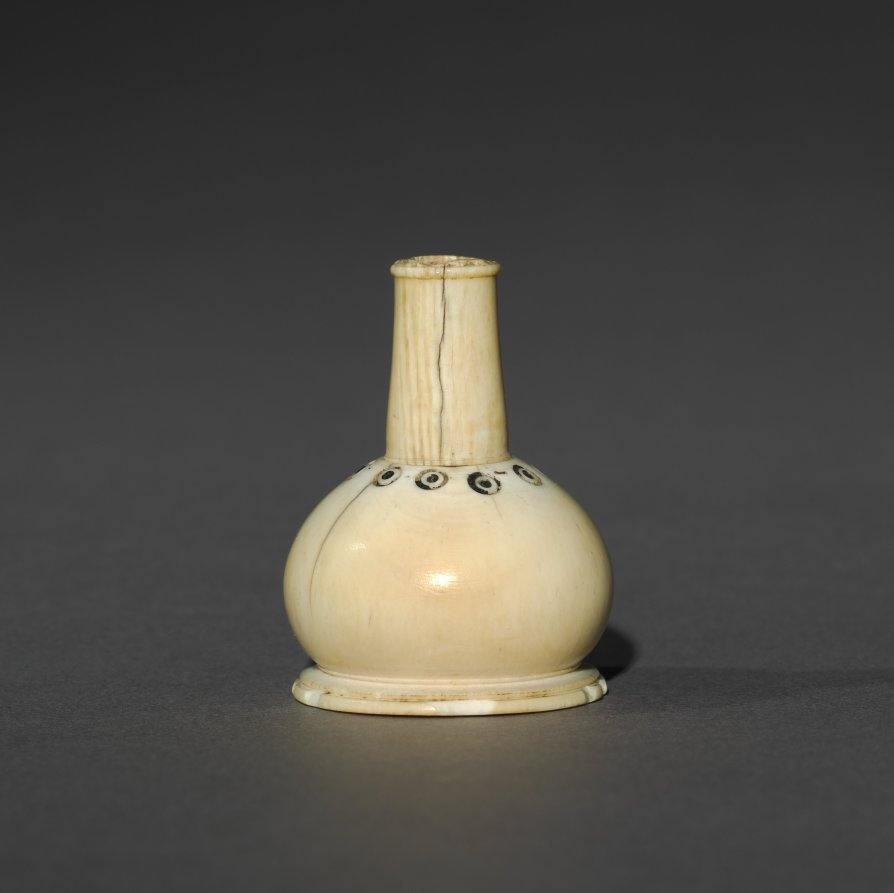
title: Miniature Vase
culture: Iran, early Islamic period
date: 700–900s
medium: ivory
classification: Ivory